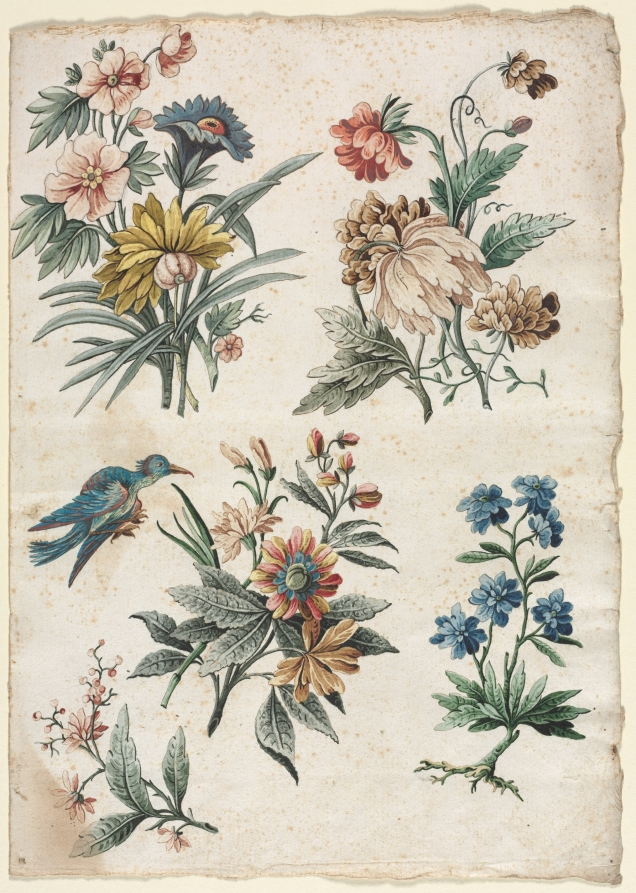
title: Floral Designs with a Blue Bird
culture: Italy, 18th century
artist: Giacomo Cavenezia (Italian)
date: c. 1773/74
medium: pen and black and brown ink, brush and black and brown wash, watercolor and gouache, over traces of black chalk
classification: Drawing